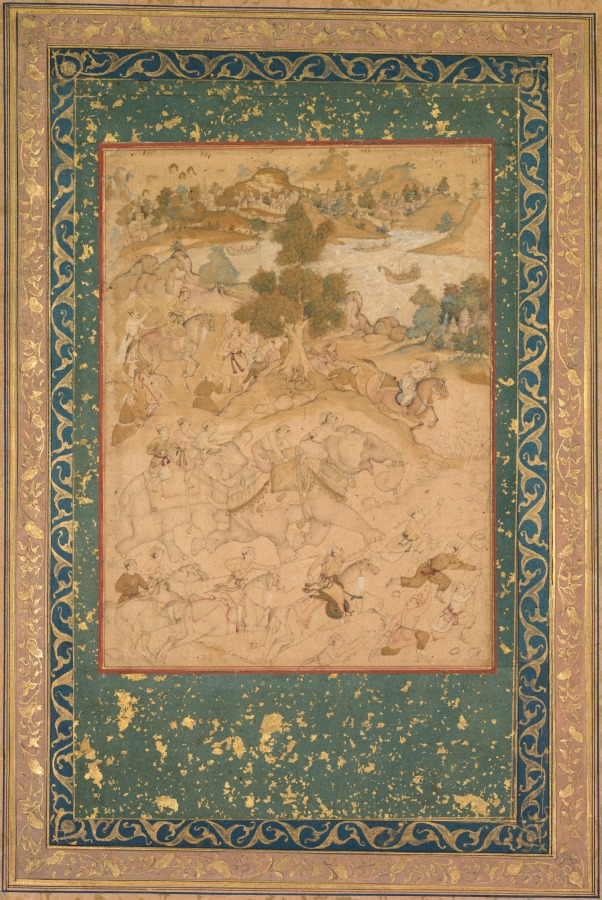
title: Akbar supervising the capture of wild elephants at Malwa in 1564, painting 90 from an Akbar-nama (Book of Akbar) of Abu’l Fazl (Indian 1551–1602)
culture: Mughal India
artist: attributed to Farukh Chela (Indian)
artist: or Govardhan (Indian, active c.1596–1645)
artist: or Dhanraj (Indian)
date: c. 1602–3; borders added c. 1700s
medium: ink with use of colors and gold on paper, mounted on an album page with borders of gold-decorated buff and blue paper (recto); calligraphy by Faqir Ali (verso)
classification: Painting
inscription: recto: Folio 229, painting 97 from the so-called Chester Beatty Akbarnama verso: calligraphy in nast'aliq script by Faqir Ali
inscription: Verso: From a ghazal of Badr al-Din Hilali Jaghata’i (Persian, active c. 1500) c. 1550; borders added c. 1700s and mounted upside down Faqir Ali (Persian, active c. 1550–1610) Probably Safavid Calligraphy, Persian verses in nasta‘liq script: He is Venerable! I am the dust on the path of the messenger to my beloved’s hallowed sanctuary; Perchance I may reach the destination in his footsteps. On the burn in my branded heart, do not place any soothing balm, So that the comfort that I draw from my pain and sorrow for my beloved does not abate.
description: This painting is from a biography of Akbar made shortly before his death. It depicts a historical event from early in his reign when he encountered a herd of wild elephants and captured many of them for his royal stables. Akbar rides horseback in the upper left, directing his men as two trained elephants give chase in the foreground. The Mughals caught wild elephants by chasing them with tame elephants, then tethering them together and feeding them their favorite food. European prints had made their way into Akbar’s collection, and they provided the visual source for distant cityscapes, rolling hills, and less densely colored paintings.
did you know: A yak-tail flywhisk, ancient Indian symbol of sovereignty, is held up for Akbar.